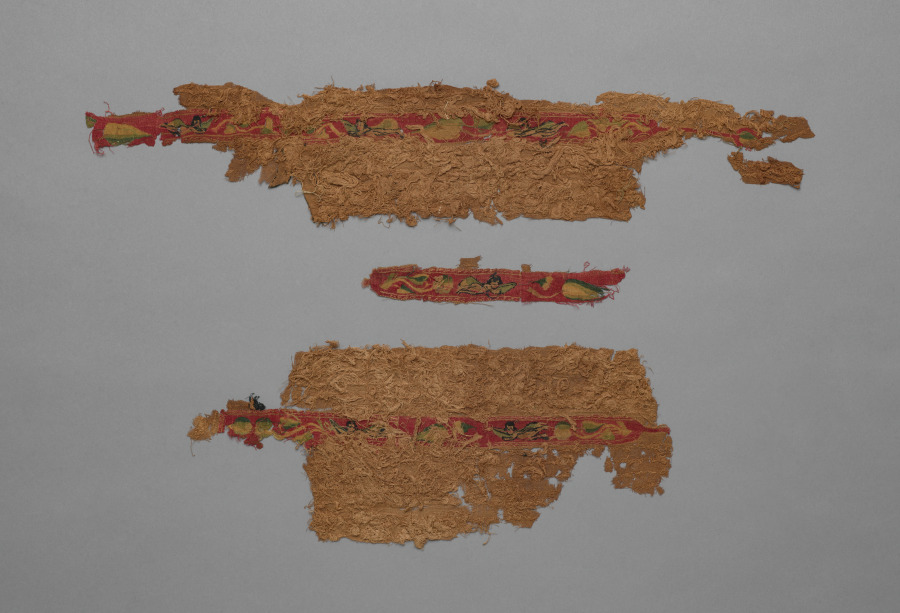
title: Fragments from a Tunic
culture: Egypt, Umayyad period (661–750)?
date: 600s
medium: tabby weave, inwoven tapestry ornament; wool and linen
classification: Textile